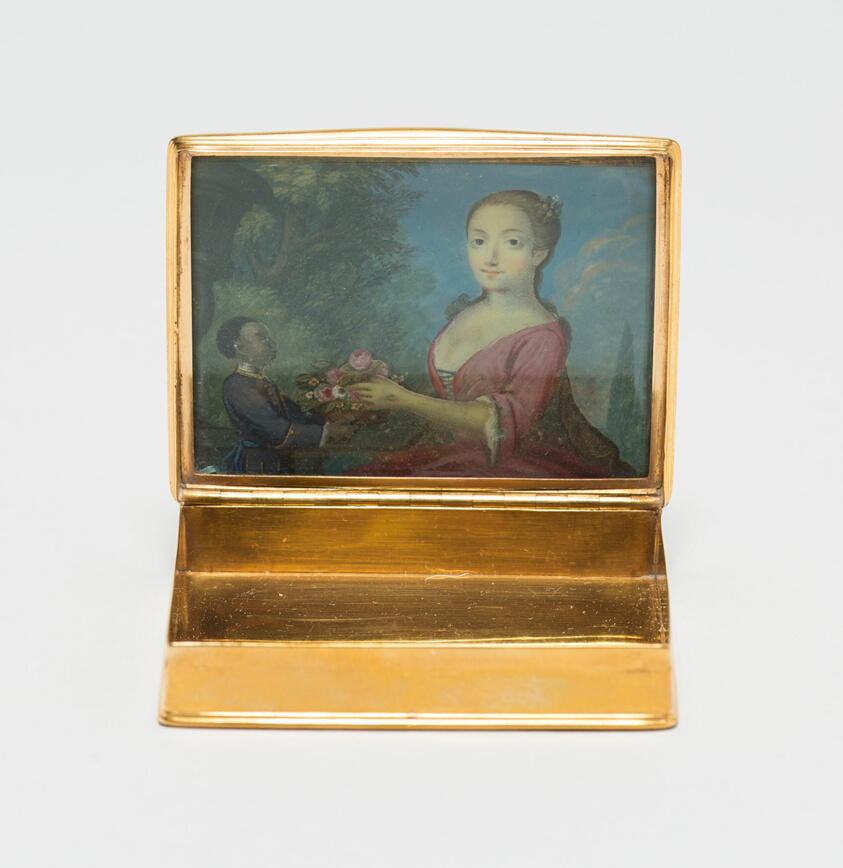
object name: Metalwork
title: Gold Box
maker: England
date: 1727/60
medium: Gold and painted metal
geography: England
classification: gold; metal; miniature; european decorative arts; metalwork